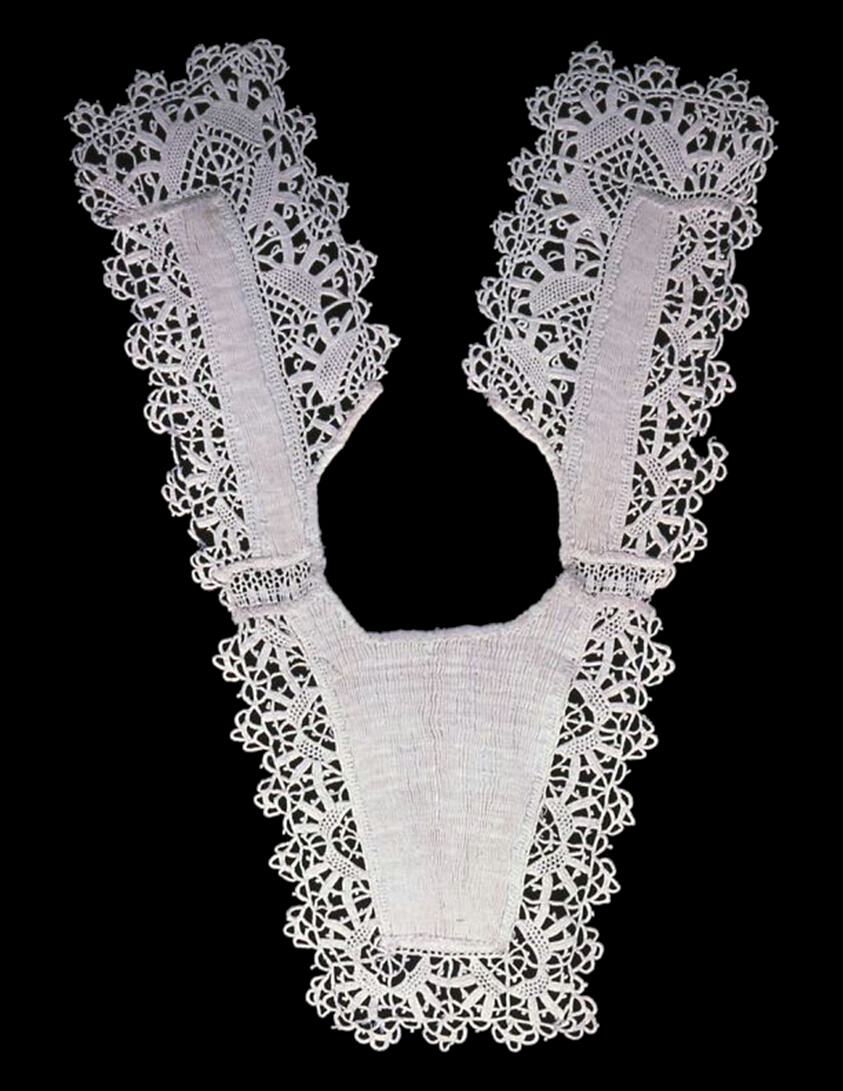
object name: Textile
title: Collar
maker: Probably Italy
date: probably 1750/1800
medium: Linen, plain weave; pleated; embroidered in double hem and threaded herringbone stitches; inserts of bobbin straight lace; edged with needle lace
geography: Italy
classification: textile; lace - mixed